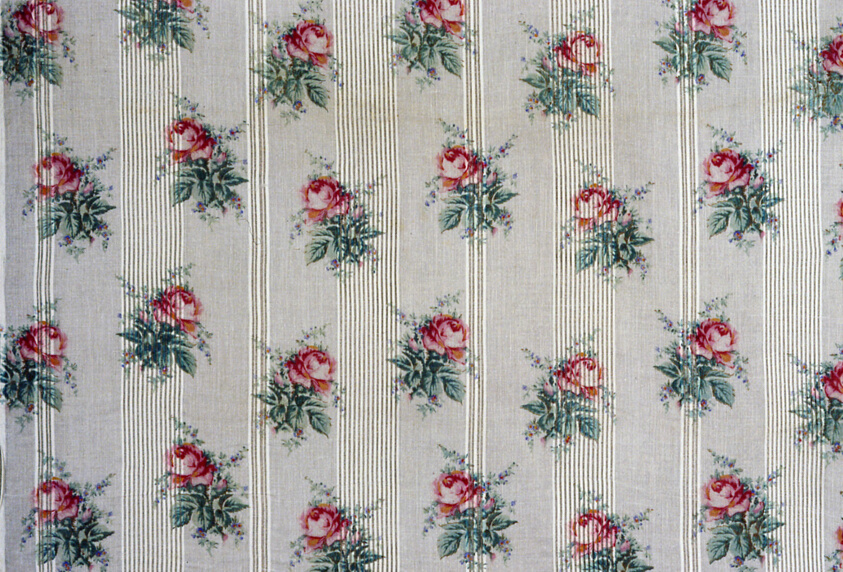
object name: Textile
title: Panel (Dress Fabric)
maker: France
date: c. 1850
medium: Cotton, stripes of plain weave; warp-float faced twill weaves; plain gauze weave; openwork; roller printed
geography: France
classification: textile; weaving - printed